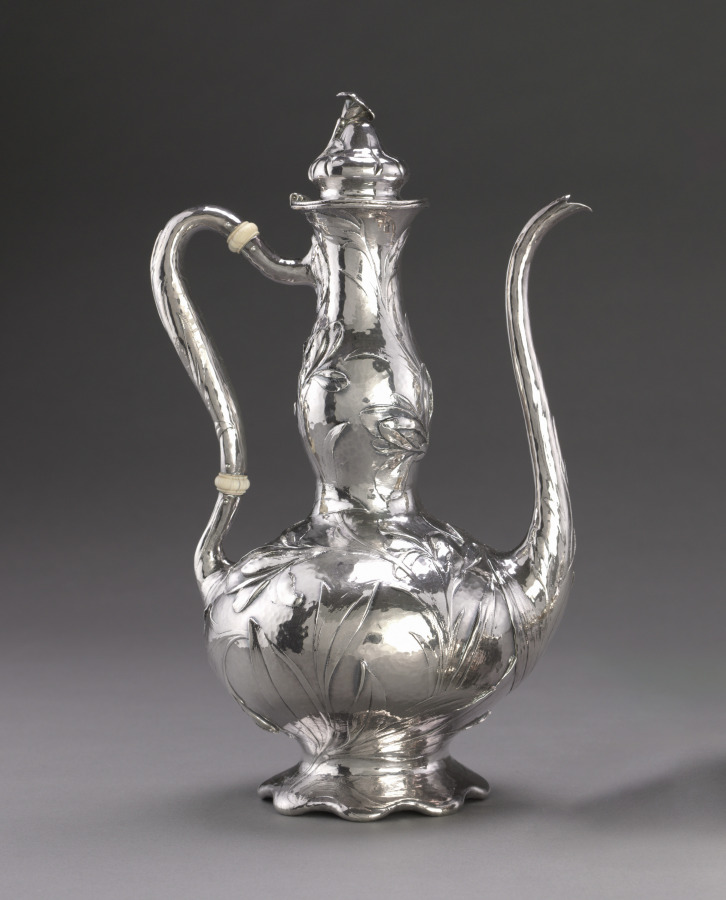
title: Martelé Coffee Pot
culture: America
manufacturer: Gorham Manufacturing Company (America, est. 1831)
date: c.1900–1910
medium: silver, ivory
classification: Silver